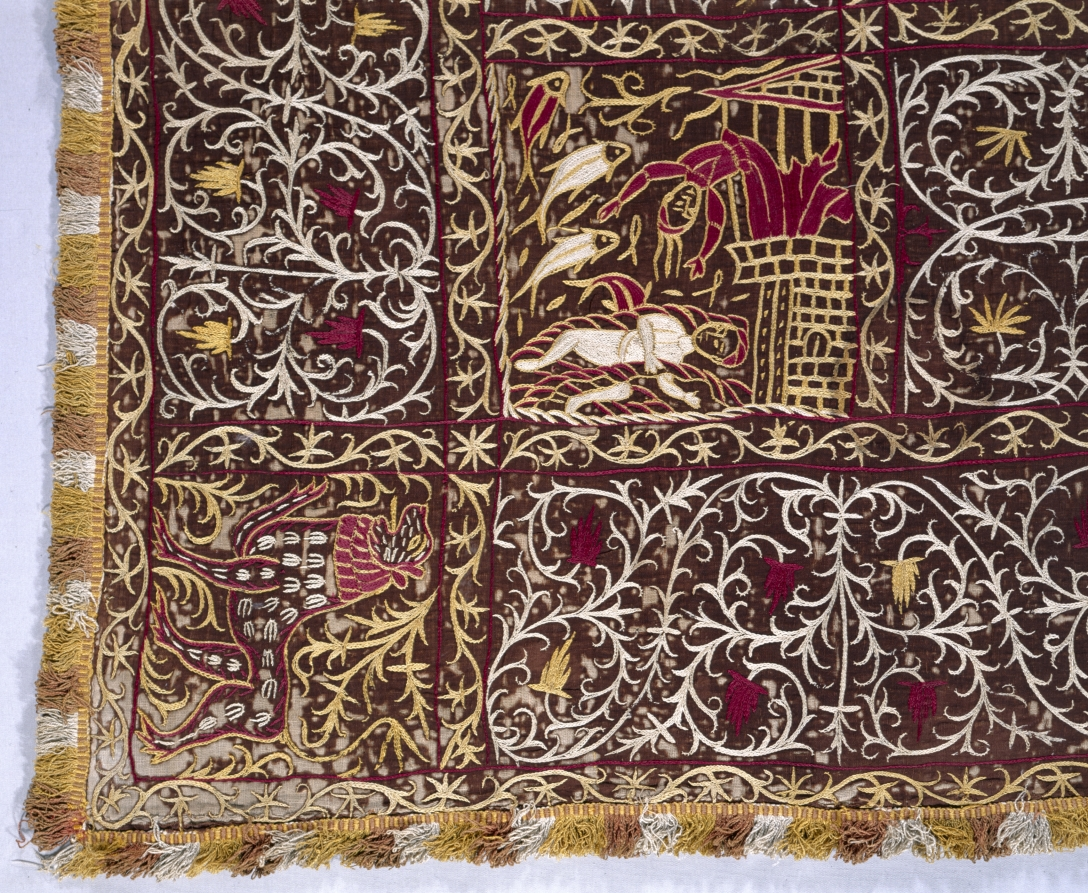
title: Bedspread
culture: India, Goa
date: 1600s–1700s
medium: Silk on cotton; embroidery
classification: Embroidery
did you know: The design features biblical scenes with Indian mythological characters and Portuguese-costumed figures embroidered in chain stitch.